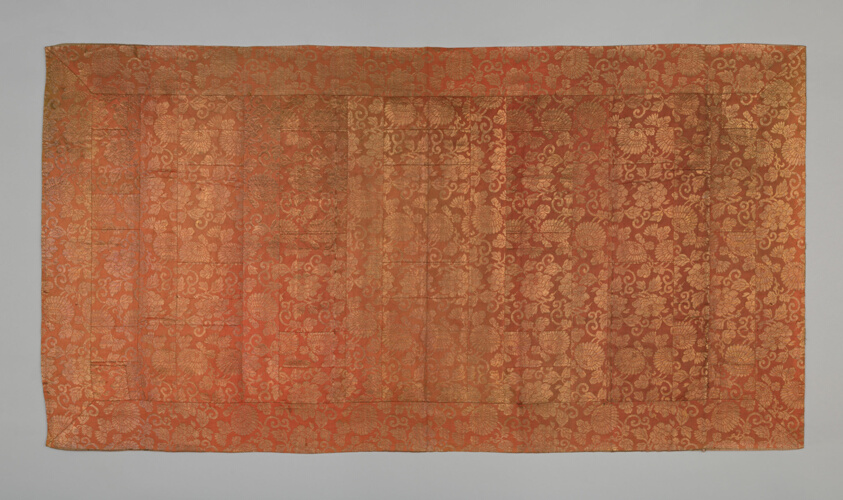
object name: Textile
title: Kesa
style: late edo, edo (japanese period)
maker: Japan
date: late Edo period (1789–1868), early 19th century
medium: silk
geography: Japan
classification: textile; weaving; liturgical - buddhist